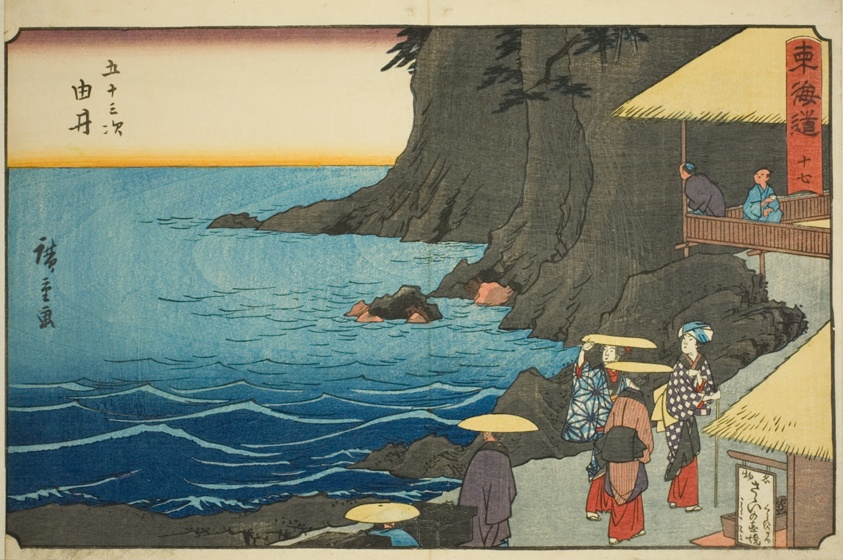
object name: Print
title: Yui—No. 17, from the series "Fifty-three Stations of the Tokaido (Tokaido gojusan tsugi)," also known as the Reisho Tokaido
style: Japanese (culture or style)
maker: Utagawa Hiroshige 歌川 広重; Japanese, 1797-1858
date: c. 1847/52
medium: Color woodblock print; oban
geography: Japan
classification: woodblock print; print; asian art